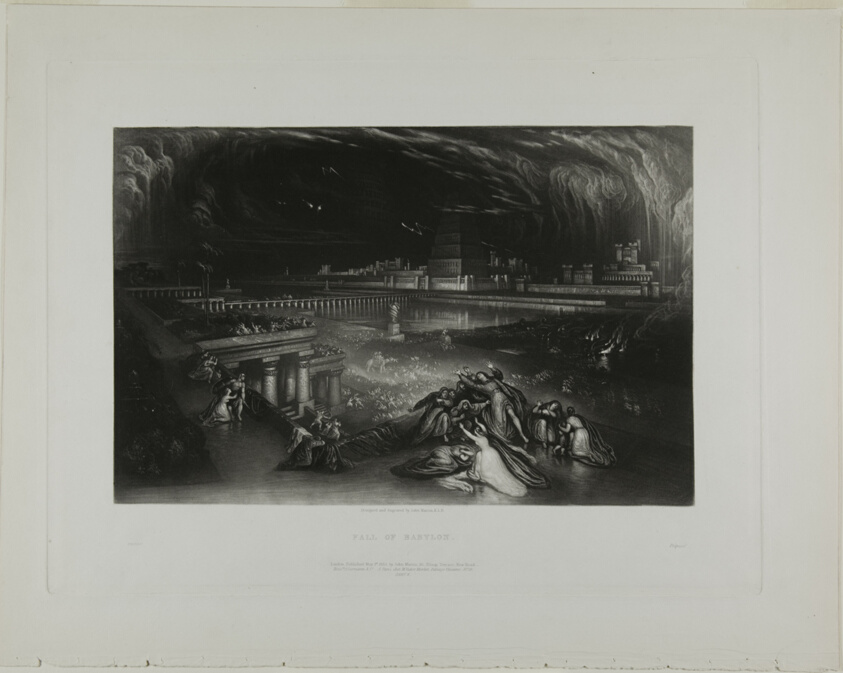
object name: Print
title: The Fall of Babylon, from Illustrations of the Bible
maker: John Martin (English, 1789-1854)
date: 1835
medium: Mezzotint with etching in black on ivory wove paper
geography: England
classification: mezzotint; print; prints and drawing